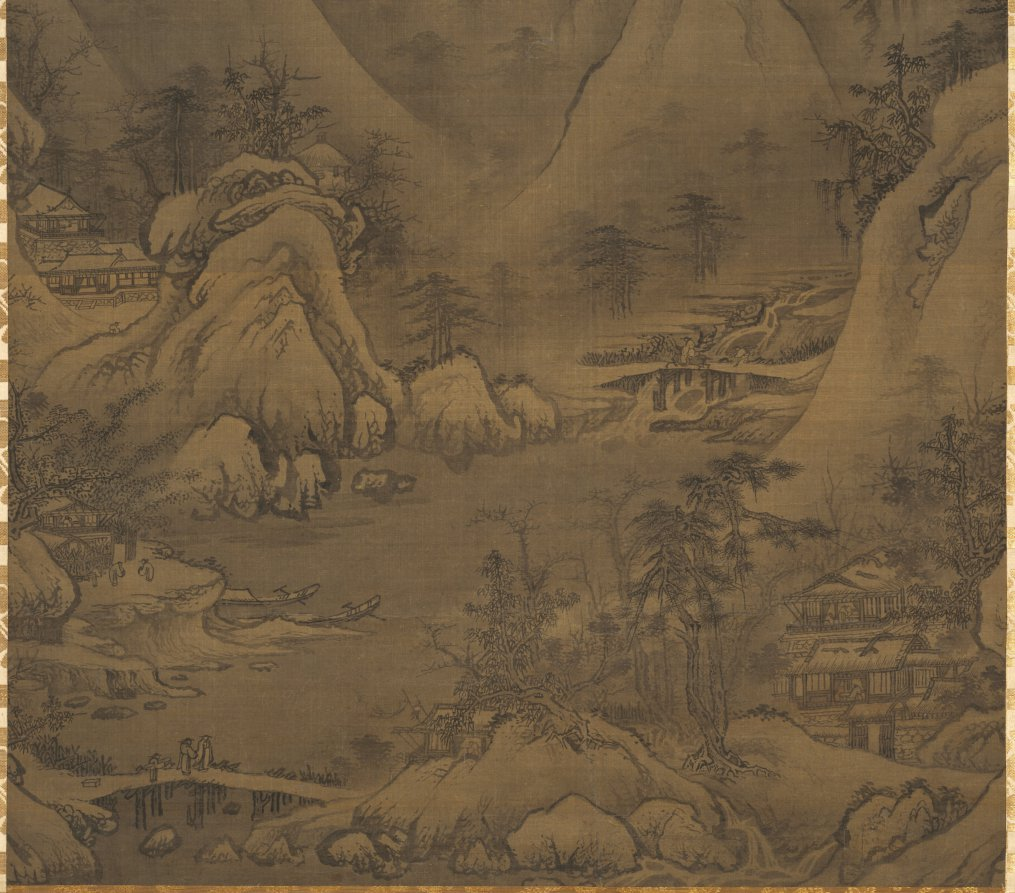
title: Winter Landscape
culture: Korea, Joseon dynasty (1392–1910)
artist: Yeoseol (Korean)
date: 1500s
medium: hanging scroll; ink and slight color on silk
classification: Painting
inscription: seal reading Nyosetsu in upper right corner.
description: This wintry vista is a vivid example of idealistic monumental painting: the strong contrasts of ink washes and contouring brush lines; the bold outlining of rock shapes and tree trunks; and the many short, twisting brushstrokes that build up the surfaces of the rocks. Much of the painting’s appeal can be attributed to the dynamic lines and contrasting tonal patterns that lead the viewer’s eye from the lower foreground toward the cold mountain peaks in the distance. In the corner is a seal that reads "Yeoseol," meaning "Snow-Like."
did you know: This wintry scenery was mainly painted in monochrome ink, but some details like the rider's horse saddle and the servant's carrier attest the use of light blue pigment.